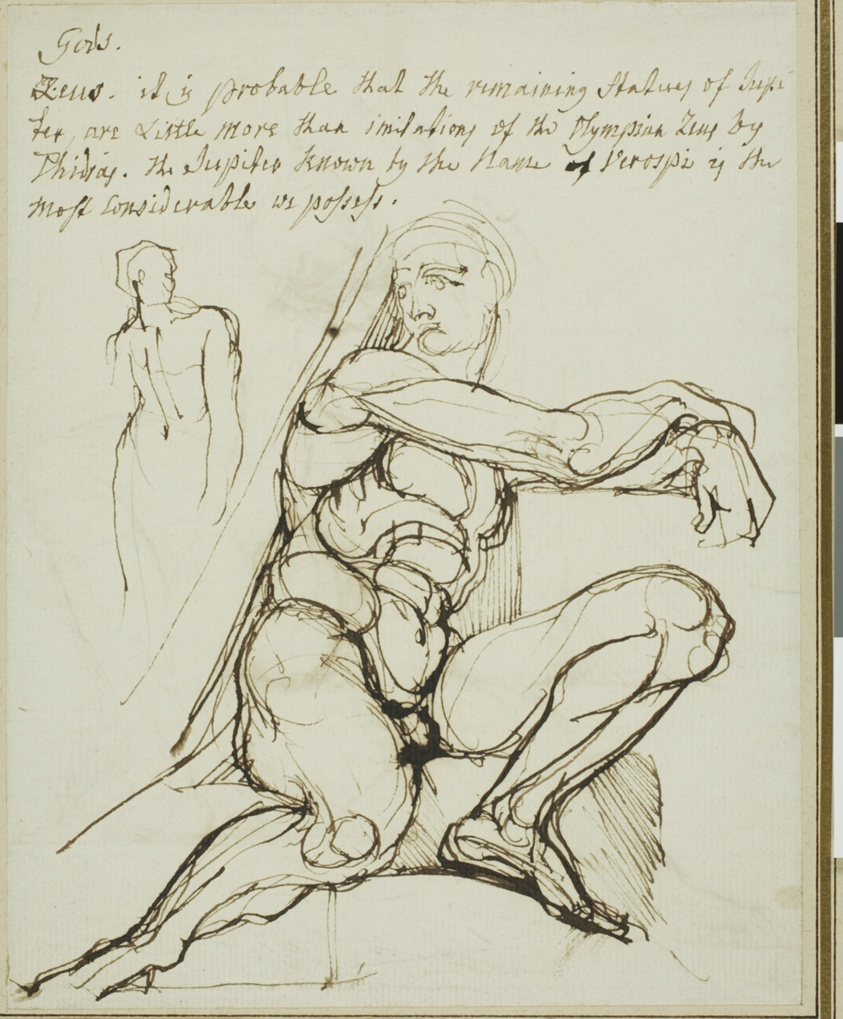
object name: Drawing and Watercolor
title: Study of Ignudo in Sistine Chapel, Rome (recto); Paraphrase of the Ignudo Seated to Upper Right of Prophet Jeremiah in Chapel, Rome (verso)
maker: Henry Fuseli (Swiss, active in England, 1741-1825); after Michelangelo Buonarroti (Italian, 1475-1564)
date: c. 1800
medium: Pen and brown ink (recto and verso) on ivory laid paper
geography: England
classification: pen and ink drawings; drawings (visual works); prints and drawing; paper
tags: zigzags